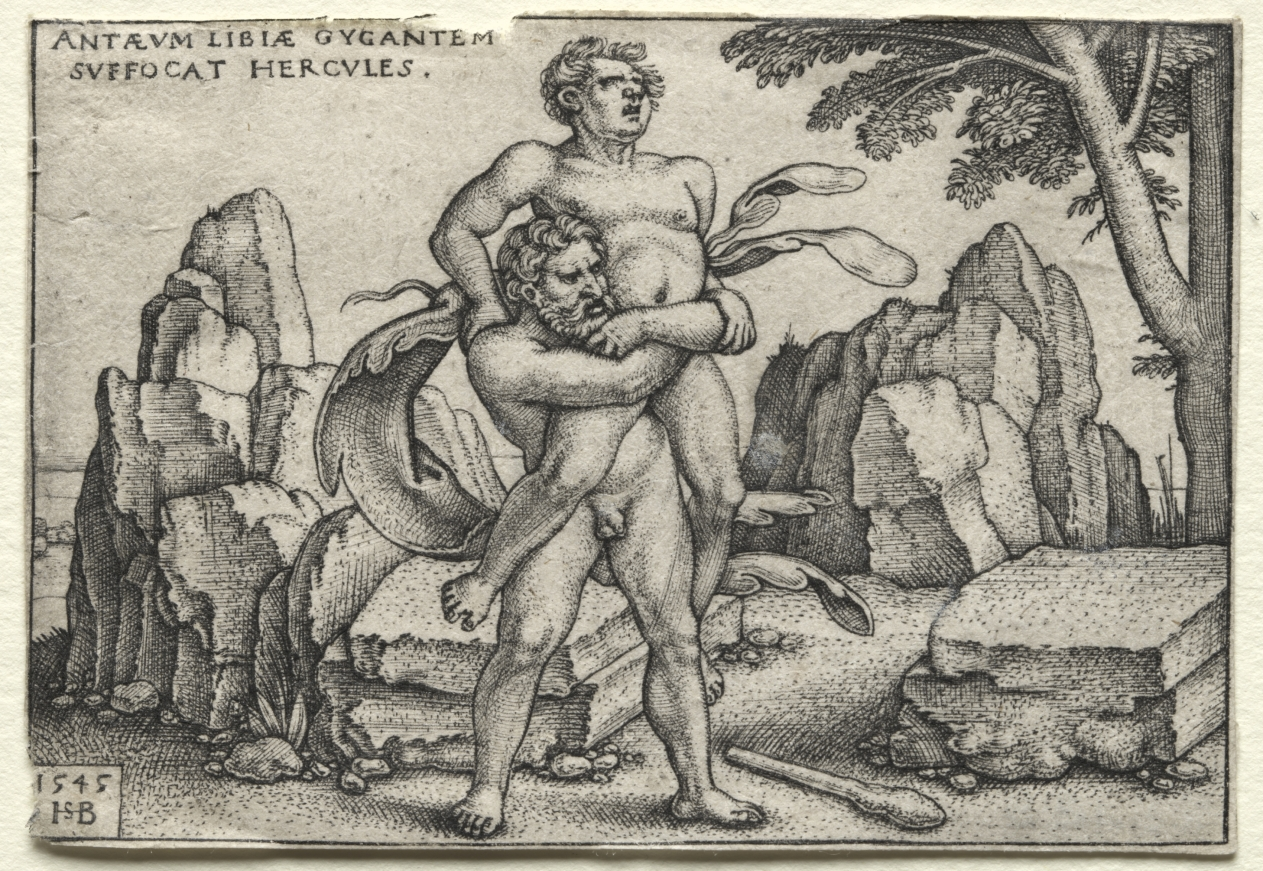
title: The Labors of Hercules: Hercules Crushing Antaeus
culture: Germany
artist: Hans Sebald Beham (German, 1500–1550)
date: 1545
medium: engraving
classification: Print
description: Beham was one of several German printmakers referred to today as the “Little Masters.” They established their artistic prowess by engraving remarkably small prints, appealing to collectors fascinated with miniature objects and curiosities. Here, Beham has packed 12 larger-than-life stories of the mighty Hercules into tiny prints. The series includes three of the 12 labors Hercules performed as penance for slaying his children in a fit of madness: Strangling the Nemean Lion, Killing the Lernean Hydra, and Dragging Cerberus from the Underworld. The other scenes depict tales from his life and the events preceding his death. The son of Jupiter and the mortal Alcmena, Hercules was both man and god. His saga of moral and physical trials made him one of the most popular classical heroes in Renaissance art.